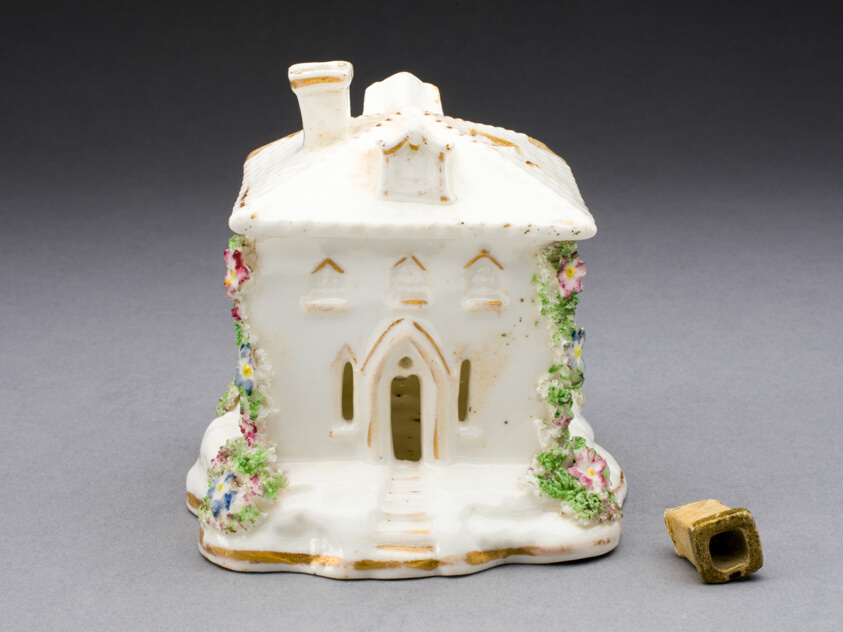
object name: Ceramics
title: Incense Burner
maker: England, Staffordshire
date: c. 1830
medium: Glazed earthenware with polychrome enamel decoration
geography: Staffordshire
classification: ceramics; european decorative arts